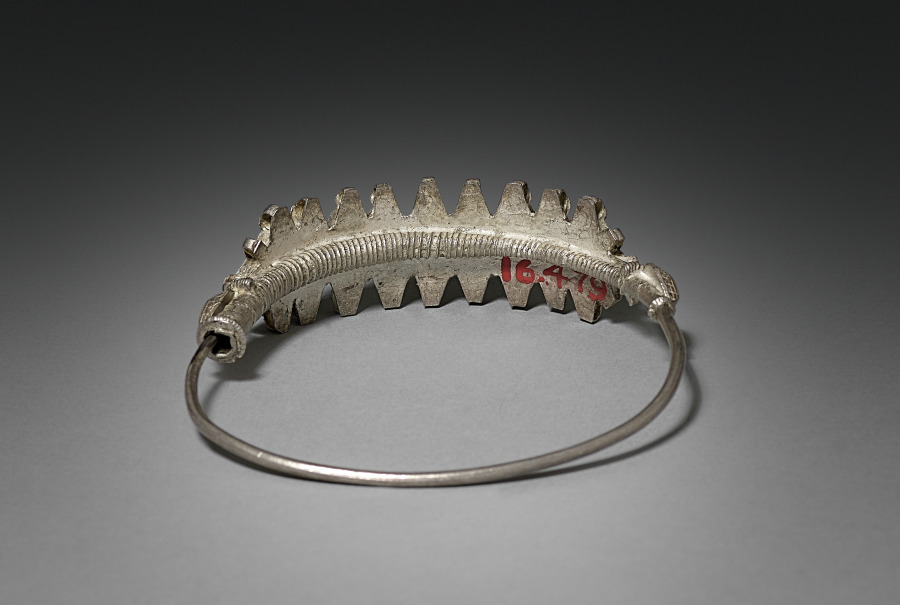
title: Nose Ring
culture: India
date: early 1900s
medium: silver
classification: Jewelry